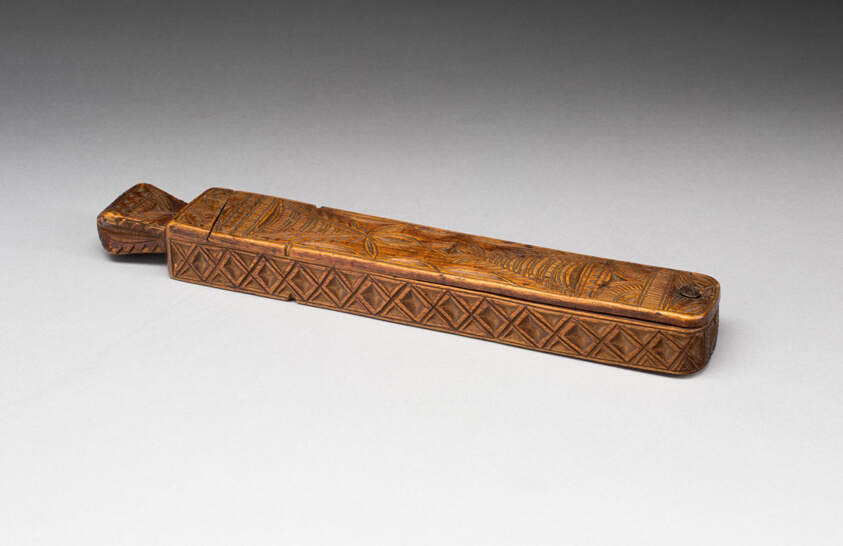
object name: Decorative Arts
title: Box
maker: Artist unknown (American, active 18th–19th century)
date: 1790–1840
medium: Maple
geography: United States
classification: box; wood; american decorative arts; american arts; decorative arts